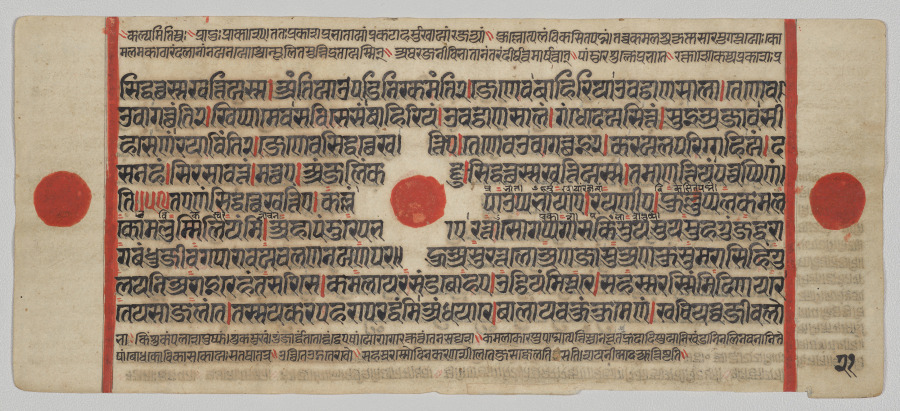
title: Text, Folio 21 (verso), from a Kalpa-sutra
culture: Western India, Gujarat, last quarter of the 15th century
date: c. 1475–1500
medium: Gum tempera, ink, and gold on paper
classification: Painting